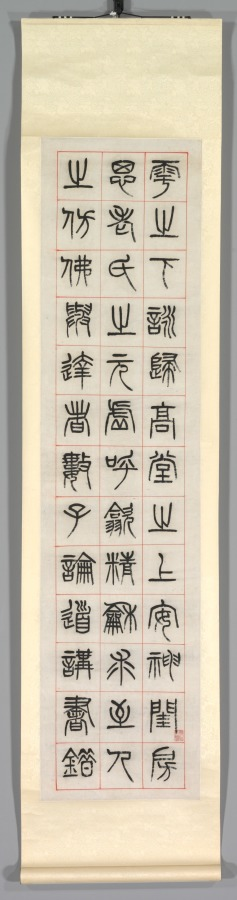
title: On Happiness, Calligraphy in Seal Script Style (zhuanshu)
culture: China, Changsu, Qing dynasty (1644-1911)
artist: Yang Yisun (Chinese, 1813–1881)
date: 1871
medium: hanging scroll, ink on paper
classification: Painting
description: Yang Yisun transcribed this ancient text on six narrow scrolls, starting at the top right and ending at the bottom left. Yang emphasizes the text’s historic nature by using the seal script style found on stone steles and bronze vessels. On Happiness features reflections of a scholar on a leisurely life in the countryside, composed by Han dynasty official Zhongchang Tong, who died the year the Han dynasty collapsed (AD 220). The idyllic life described in the text may bean evocation of the past in a time of national crisis. A decade before Yang wrote these scrolls, Anglo-French forces had looted and burned the Summer Palace in Beijing. At the same time, the domestic Taiping rebellion (1850–64), led by a religious fanatic to overthrow the Qing government, had devastated Yang’s homeland, the Jiangnan region, with an estimated 20 million lives lost.